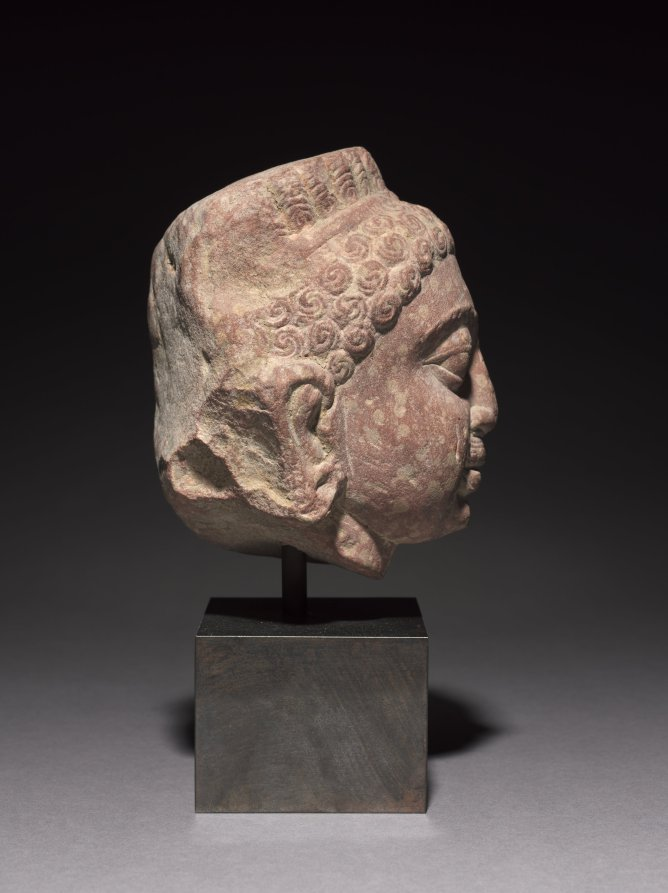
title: Head of Kubera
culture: Northern India, Mathura, Kushan period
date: 200s CE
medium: spotted red sandstone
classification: Sculpture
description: Kubera is the god of wealth, and he is most often depicted with a moustache during this period.